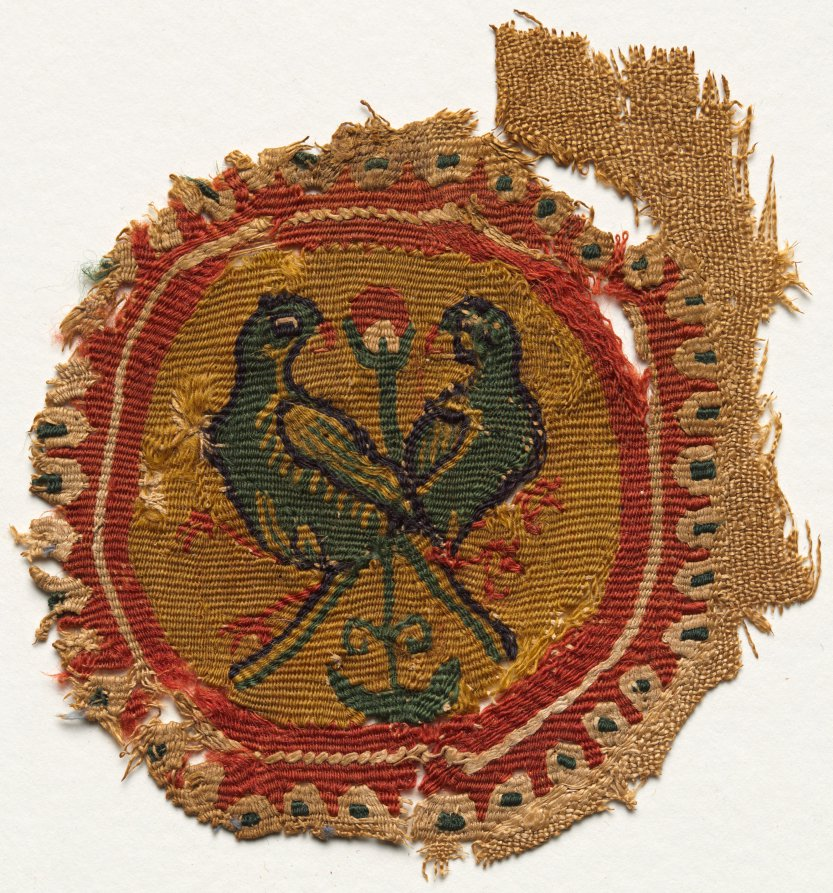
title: Segmentum from a Tunic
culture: Egypt, Umayyad period (661–750)?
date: 600s–700s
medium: Wool and linen: tabby weave, inwoven tapestry ornament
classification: Textile